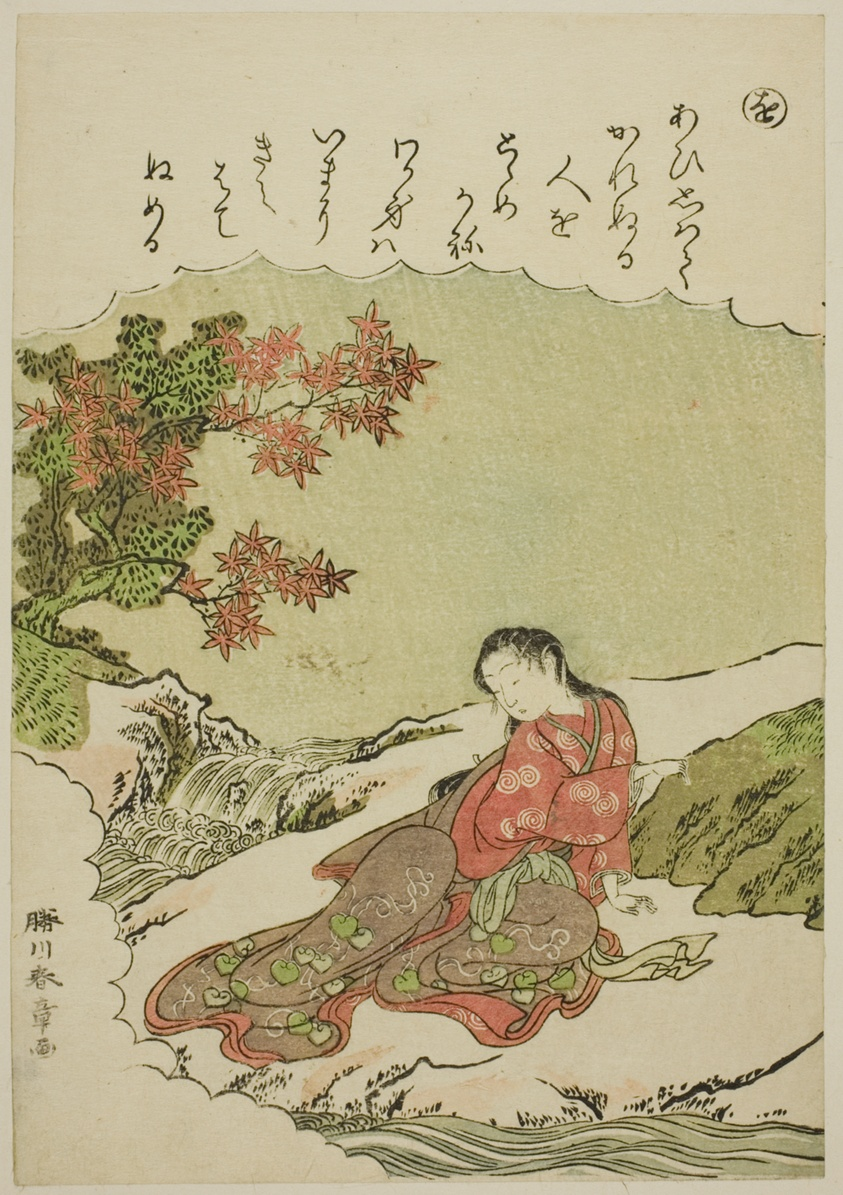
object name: Print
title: "O": Catalpa Bow, from the series "Tales of Ise in Fashionable Brocade Pictures (Furyu nishiki-e Ise monogatari)"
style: Japanese (culture or style)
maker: Katsukawa Shunsho 勝川 春章; Japanese, 1726-1792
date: c. 1772/73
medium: Color woodblock print; koban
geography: Japan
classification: woodblock print; print; asian art